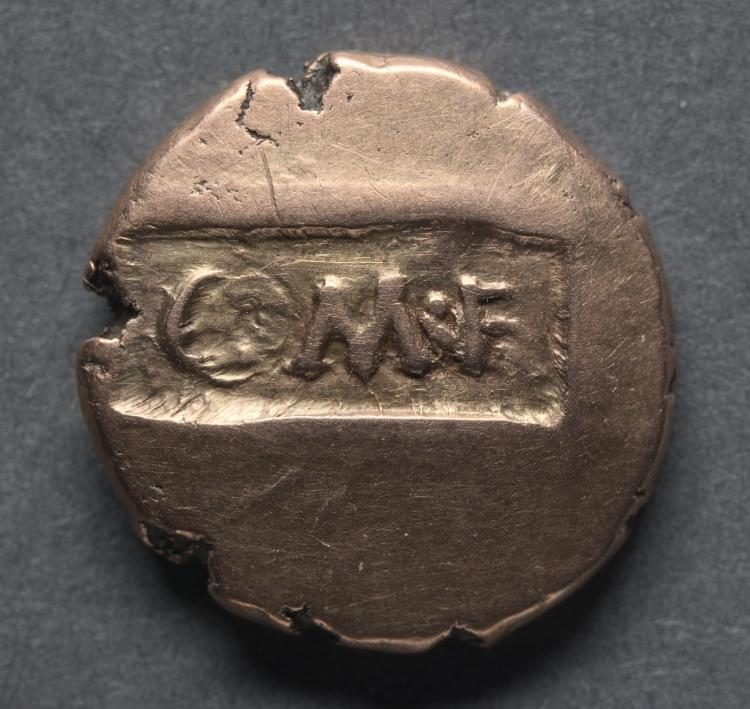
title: Verica Stater: Horse and Rider (reverse)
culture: England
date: c. 10–40 CE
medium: gold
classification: Coins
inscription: "VIR REX."